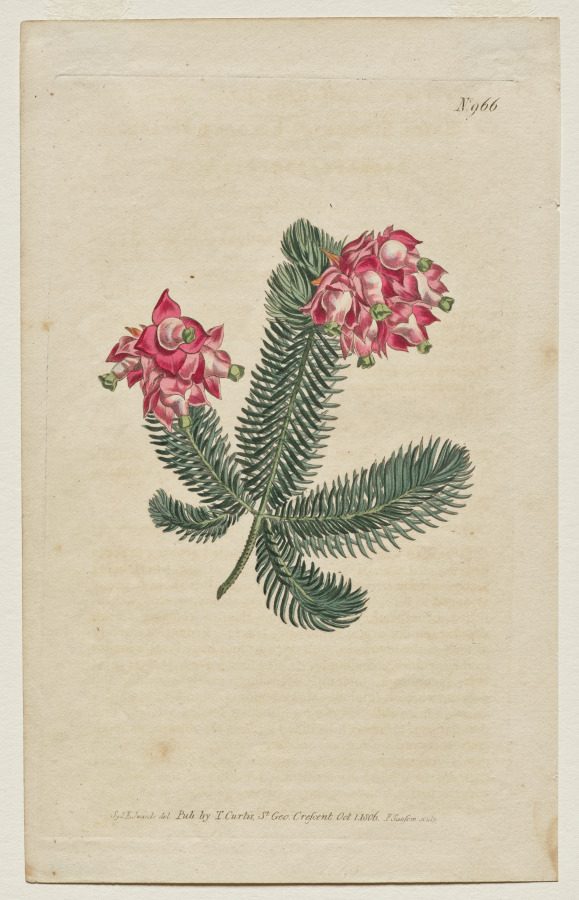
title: The Botanical Magazine or Flower Garden Displayed: Plate 966, Erica Elegans. Elegant Heath [Erica glauca]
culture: England, 19th century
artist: Francis Sansom (British, 1815)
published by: Thomas Curtis (British, 1846–1920)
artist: after Sydenham Edwards (British, 1768–1819)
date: 1806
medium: engraving with hand coloring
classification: Print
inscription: upper right corner, engraved: No. 966 lower margin, engraved: Syd. Edwards del. By T. Curtis, St. Geo. Crescent October 1, 1806 F. Sansom sculp.